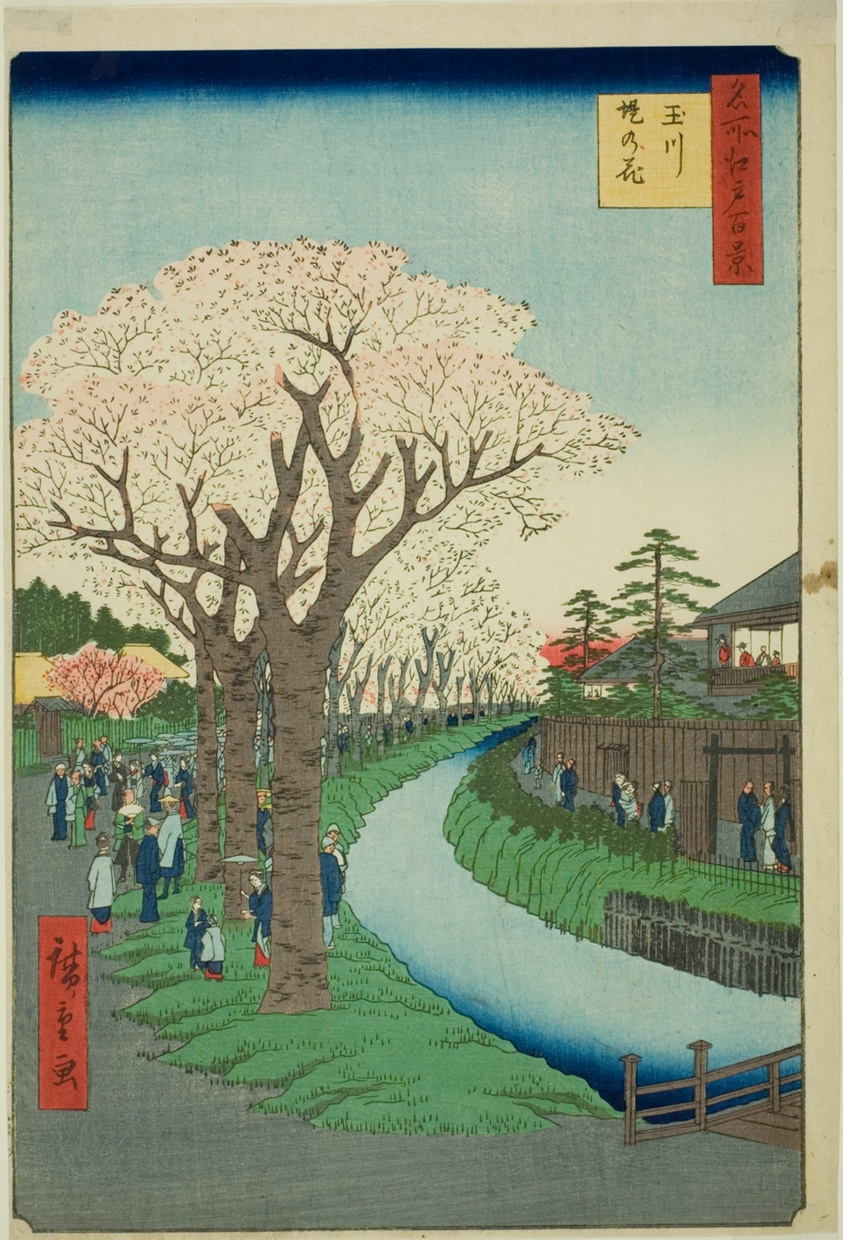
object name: Print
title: Blossoms on the Tama River Embankment (Tamagawa-zutsumi no hana), from the series "One Hundred Famous Views of Edo (Meisho Edo hyakkei)"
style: Japanese (culture or style)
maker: Utagawa Hiroshige 歌川 広重; Japanese, 1797-1858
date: 1856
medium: Color woodblock print; oban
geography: Japan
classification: woodblock print; print; asian art